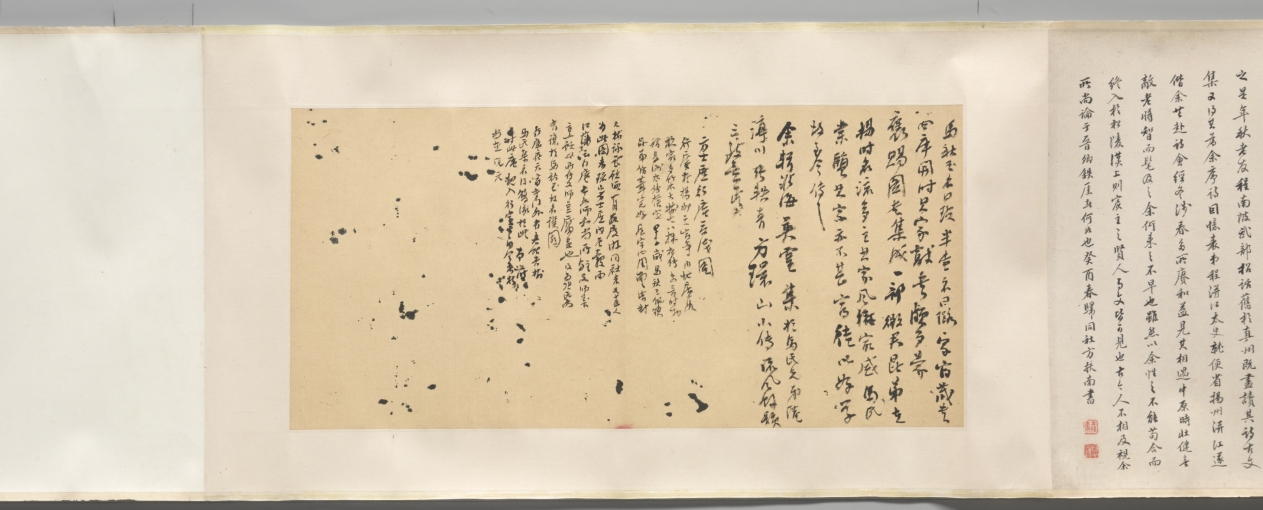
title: The Ninth Day Literary Gathering at Xing’an [Temporary Retreat]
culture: China, Qing dynasty (1644-1911)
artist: Fang Shishu (Chinese, 1693–1751)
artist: and Ye Fanglin (Chinese, active late 1600s–mid-1700s)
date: 1743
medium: Handscroll; ink and color on silk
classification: Painting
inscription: Fang Shishu's seal at beginning of painting: Ou ran shi de 偶然拾得. Ye Fanglin's seal at end of painting: Fanglin 芳林. Frontispiece title dated 1743 and 3 seals of Chen Bangyan 陳邦彦 (1678-1752).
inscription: 行庵在揚州北郭天寧寺西隅，馬君嶰谷半槎兄弟購僧房隙地所築，以為游息之處也。寺為晉謝太傅別墅。西隅饒古木，䨴鬱陰森，入林最僻，不知其近郛郭。庵居其中，無斲礱髤采之飾，惟軒庭多得清蔭，來憩者每流連而不能去。乾隆癸亥九日，積雨既收，風日清美，遂約同人，咸集於斯，中縣［懸］仇英白描陶靖節像，采黃花，酌白醪為供，乃以人世難逢開口笑，菊花雖插滿頭歸分韻賦詩。陶陶衎衎，觴詠竟日。既逾月，吳中寫真葉君敬［震］初適來，群貌小像，合為一卷，方君環山補景，命曰九日行庵文讌圖。裝池成，將各書所作於後，而囑鶚為之記。記按圖中共坐短榻者二人：右箕踞者，為武陵胡復齋先生期恆；左抱膝者，為天門唐南軒先生建中也。坐繩床者二人：中手牋者，歙方環山士庶；左仰首如欲語者，江都閔玉井華也。一人坐藤塾捻髭者，鄞全謝山祖望也。一人倚石坐若凝思者，臨潼張漁川四科也。樹下二人：離立把菊者，錢唐厲樊榭鶚；袖手者，錢唐陳竹町章也。一人憑石床坐撫琴者，江都程香溪先生夢星也。聽者三人：一人垂袖立者，祁門馬半查曰璐；二人坐瓷塾，左倚樹、右跂腳者，歙方西疇士疌 、汪恬齋玉樞也。二人對坐展卷者，左祁門馬嶰谷曰琯，右吳江王梅沂藻也。一人觀者，負手立於右，江都陸南圻鐘輝也。從後相倚觀者一人，歙洪曲溪振珂也。童子種菊者三人：樹間侍立者一人，撰杖、執卷者各一人。其植有蕉、有竹，又有雜樹，作丹黃青碧之色，紀時也。夫重九佳名，舉俗所重，而高常侍歎獨坐而搔首，陸天隨感登高以剫門，無其時地與人耳。今吾儕幸生太平，遇勝地，又皆素心有文之侶，固人世不可多得之會；而此十六人者，或土斷，或客游，聚散不常。異日者，歲月遷流，撫節物以有懷，一披此圖，悅如晤對。將來覽者，或亦不異此意乎。甲子夏五十有四日厲鴞記並書。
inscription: 揚州為江北大都會，居民連甍接楹，笙歌輿從，竟日喧聚，其於淸歌雅集，葢罕矣。城北天寧寺，為晉謝公駐節時所游息，其中有行庵，吾友馬君嶰谷、半查兄弟之小築也。地不踰五畝，而老樹古藤，森蔚相望，皆千百年物，間以修竹，春鳥秋蟲，更唱迭和，其間曲廊高榭，位置閑適。出門未數百步，即黃塵濁流極目，令人作惡。而此中獨蕭然有人外之思。乾隆八年九日，嶰谷兄弟招集同社一十四人祀陶公，出所藏仇實父白描像懸於閣上，各賦一詩。予方留滯西泠，未得預也。又踰旬而予至，諸君方擬繪圖記事，嶰谷曰：是不可無君。乃以展日更舉，令予得陪卷軸之末；而洪君曲溪，兩度皆以病失約，然故吟社中人也，亦補入焉。予太息謂諸君曰：謝公之風流，千古如在；然其游息於斯也，則與東山賓從之樂稍不同矣。公之為是行也，蓋以符氏之亂，思北定中原也。而其時公巳困於讒口，不自安於朝；雖在河朔極有可乘之會，而神明內索，徘徊不克自前。老師左次，竟無尺寸之功，坐失事幾。吾常過邵伯之埭，吊法雲之荒祠，未嘗不喟然累啼，以為明德之衰也。至若九日嘉名，陶公高格，固在羲皇懷葛之間；然而讀其 止酒之詩，蒼梧漢水之感，以瘦詞寄其孤憤則夫黃花白酒，蓋亦不得巳而漫與焉者。今吾輩生逢太平之日，書淫墨癖，是處留連，胸次中了無一事，為江湖之幸民，論人雖甚媿，論其時與地，則不可不私相慶也。諸君曰：善。圖之詳巳見於厲君樊榭記中。予之許為嶰谷兄弟序斯圖也，三年於茲；今夏重披圖捉筆，而唐丈南軒，巳化為異物矣。對酒當歌，人生幾何，願與諸君並日相遇從焉。丙寅夏杪孤山社小泉翁全祖望序。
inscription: 6 additional colophons and 15 additional seals: 1 colophon, dated 1746, and 1 seal of Huang Zhijun 黃之雋 (1668-after 1746); 1 colophon and 2 seals of Zha Xiang 查祥 (1718 jinshi); 1 colophon, dated 1746, and 3 seals of Zhang Siwen 張思問; 1 colophon, dated 1748, and 4 seals of Shao Dong 卲東 (1721 jinshi); 1 colophon, dated 1753, and 2 seals of Fang Shiju 方世舉 (signing as Fang Funan 方扶南); 1 colophon, dated 1808, of Ruan Yuan 阮元 (1764–1849); 3 seals unidentified.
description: By the 1700s, Yangzhou was flourishing both economically and culturally as the most prosperous city in China, having surpassed all other Jiangnan cities in their creation of gardens. This group portrait commemorates a literary gathering in the private garden of the salt merchants and art patrons Ma Yueguan (1688–1755) and his brother Ma Yuelu (1697–after 1766) in Yangzhou. Ma Yueguan received imperial recognition for providing financial aid and food relief for those affected by flood and drought. Ma Yueguan is seen seated at the end of the painting holding an open scroll while Ma Yuelu stands behind the qin instrument player. Among the guests were officials, scholars, poets, painters, and merchants, a mix of local members of a poetry club reflecting increasing social diversity.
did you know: The two hosts and their fourteen guests were all officials, scholars, poets, painters, and salt merchants.